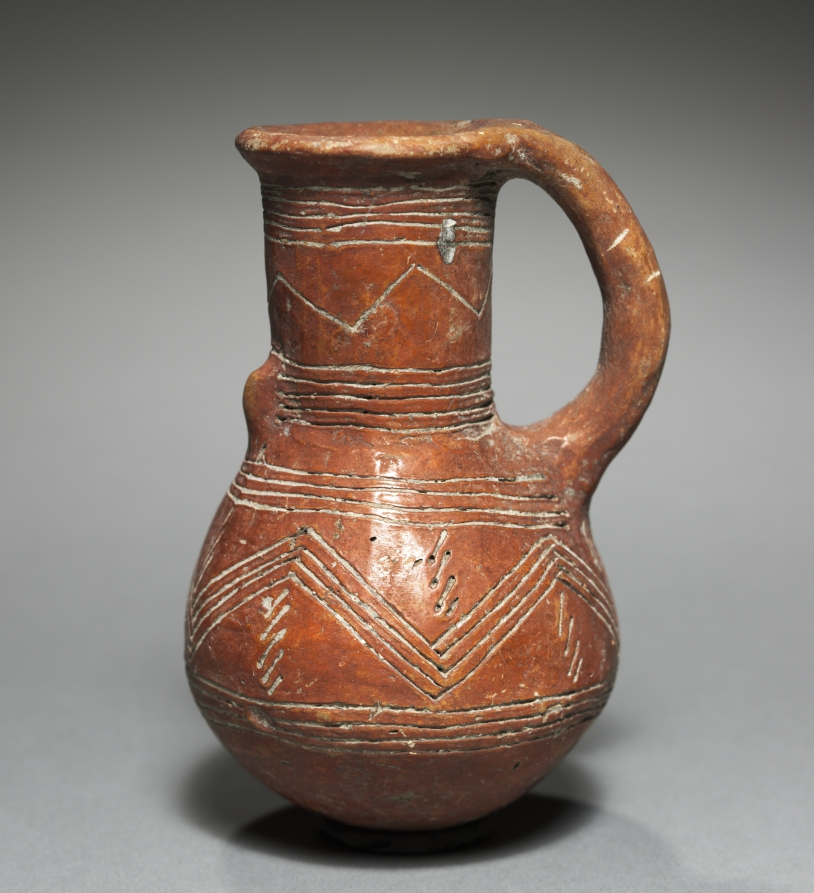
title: Jug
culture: Cyprus, early Cypriot III-middle Cypriot II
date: 2000–1800 BCE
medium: red ware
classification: Ceramic